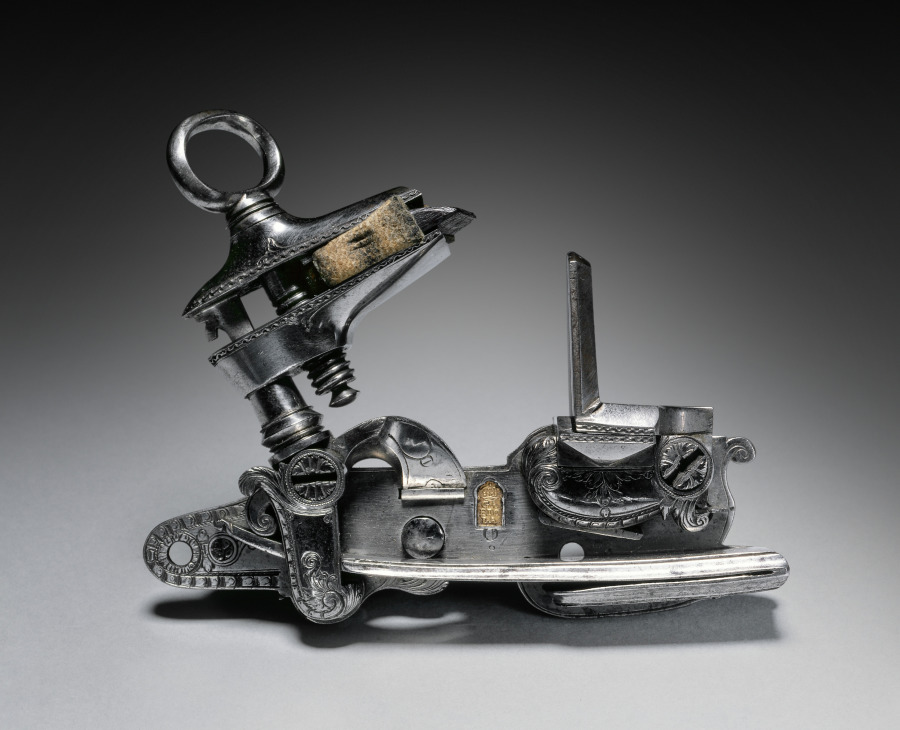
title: Miquelet Lock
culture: Spain, Eibar, late 18th Century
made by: Domingo Gabiola (Spanish)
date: c. 1790–1800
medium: steel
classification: Arms and Armor